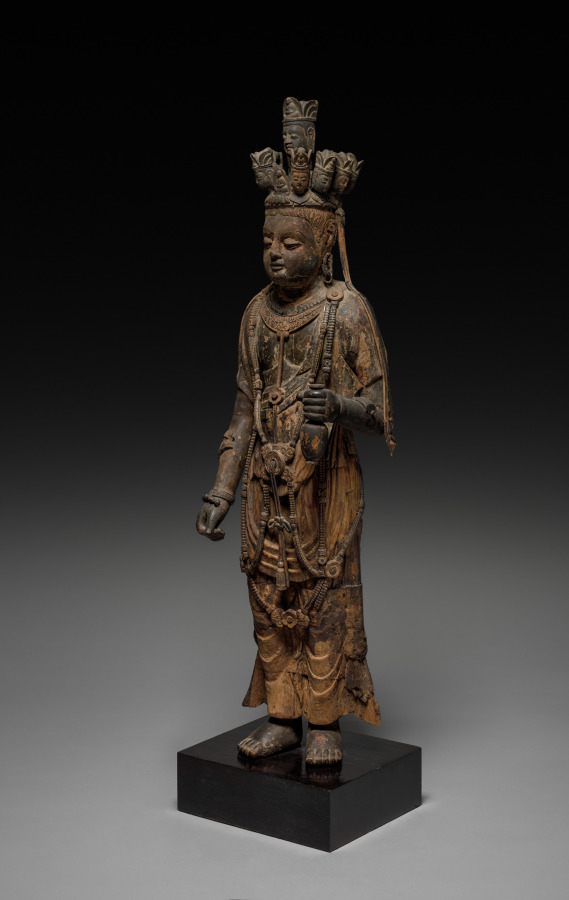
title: Eleven-Headed Guanyin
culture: China, Tang dynasty (618–907)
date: late 600s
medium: wood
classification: Sculpture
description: Guanyin, the bodhisattva of infinite compassion, can be identified by his attributes, carrying a tiny Amida Buddha in his crown, and holding a bottle with the nectar of life in his left hand. The eleven-headed Guanyin, in particular, has his eyes and ears open in all directions to hear, see, and help all those who are in distress. The garment and jewelry of this graceful figure remind us that the historic Buddha Shakyamuni was originally an Indian prince before he reached enlightenment. Upon his death, he entered nirvana, an eternal state free of desire and suffering, outside the realm of birth, death, and rebirth. The dating and attribution of the figure as being from China needs further study.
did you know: The sculpture was made of different types of wood with different grain sizes and patterns, which are connected with wood pegs and glue.